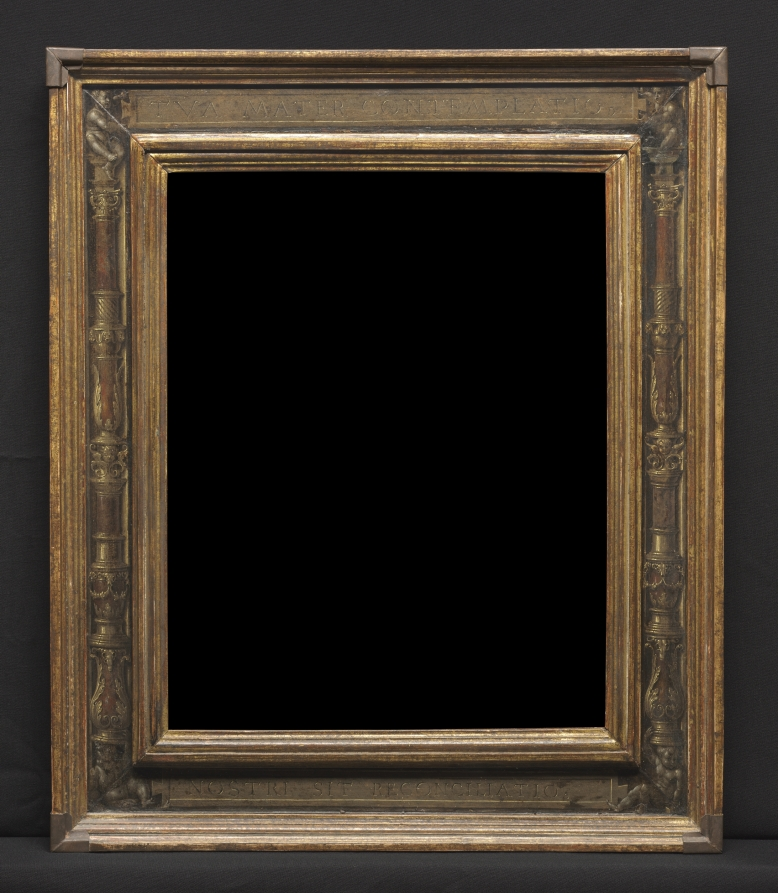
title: Virgin and Child in a Landscape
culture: Flanders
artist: Jan Gossaert (Flemish, c. 1475/78–1532)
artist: and an Anonymous Landscape Painter (Flemish)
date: 1531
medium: oil on wood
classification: Painting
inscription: Signed lower left: "1531 / JOANES / MALBO [...] / PÏGEBAT"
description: Among the first northern European artists to study in Rome, Gossaert returned north to serve in various German and Flemish courts, incorporating Italian Renaissance ideas. Gossaert also painted the frame, including the Latin inscription: "Mother, may your contemplation be our reconciliation." The patron is likely Mencía de Mendoza, a Spanish noblewoman, one of the most important art collectors and intellectuals of the early 1500s.